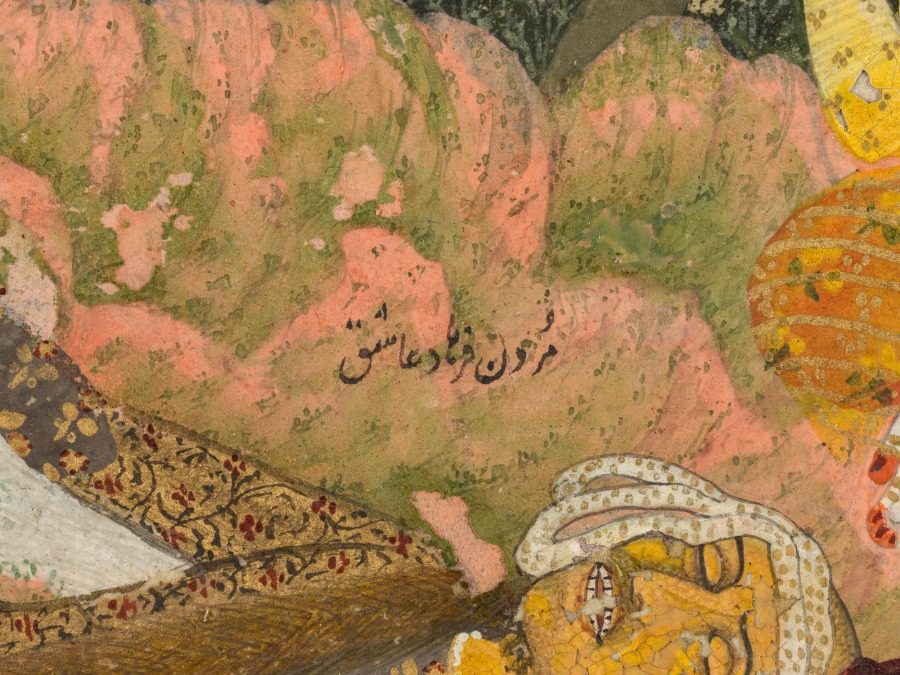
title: Lovers and beloveds: A composite of scenes from Persian, Urdu, and Sanskrit literature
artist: Chitarman II (Indian, c. 1680–с. 1750)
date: c. 1735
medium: Gum tempera and gold on paper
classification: Painting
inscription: Persian inscriptions throughout, in nasta‘liq script: Top left: The celebrated lover Ranjha; Top right, above awning: The notable ladies of the city falling into a swoon having caught sight of Joseph’s beauteous countenance; Top center, on pillar beneath canopy: The celebrated lover Vamiq; On another pillar, behind the woman’s head: The celebrated beloved ‘Azra; Upper left, on pillar: King Nala, the lover; Central figure with halo: The coming from the prison and sitting [in state] of the Lord Joseph the Prophet, with the women of the town cutting the palms of their hands and falling down unconscious; Left of center: [. . . cutting palms . . . wine cups fell from their hands . . . state of wonderment . . .]; Central pavilion at left: Sassi, the beloved the lover [Punnun]; Below central figure of Joseph: The stream of milk Shirin the beloved, weeping The death of Farhad, the lover; Lower right, in front of bearded man: Hafiz of Shiraz; Below his decanter: The stick of candy [referring to the woman with whom, according to popular lore, Hafiz was supposed to have fallen in love as a youth]; Behind the pavilion at right: Bride descending into a grave . . .; On the white railing to the left: Khwaja Bu Ali . . .; Bottom left: Queen Padmavati, the beloved, King Ratnasena, the lover; Bottom right: Majnun, the lover; On page held by Majnun: Say, “He is Allah, who is One, Allah the eternal refuge. He neither begets nor is born, Nor is there to Him any equivalent.” [Qur'an, chapter 112]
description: The figure of Joseph, identified by his halo, sits in the center near the top of this painting of heroes and heroines of ten different Persian, Urdu, and Sanskrit romances. The depicted scene occurs after Joseph has been purchased by Zulaykha in Egypt. Zulaykha, wishing to show him off to her friends and acquaintances, invites them to her home where she supplies oranges and knives. When the women see Joseph, they all are so distracted by his divine beauty that they accidentally cut their hands while peeling their oranges, but remain mesmerized by his appearance. The dramatic scene in the center is from the Persian romance of Khusrau and Shirin, in which Farhad, a stonecutter who loved Shirin, threw himself to his death from a mountaintop after hearing news of Shirin’s death, falsely sent to him from his rival Khusrau. The emaciated Majnun is in the lower right corner. Every vignette has been identified with a tiny Persian inscription.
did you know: Below the bearded poet Hafiz is the woman he loved; her name was Stick of Candy.